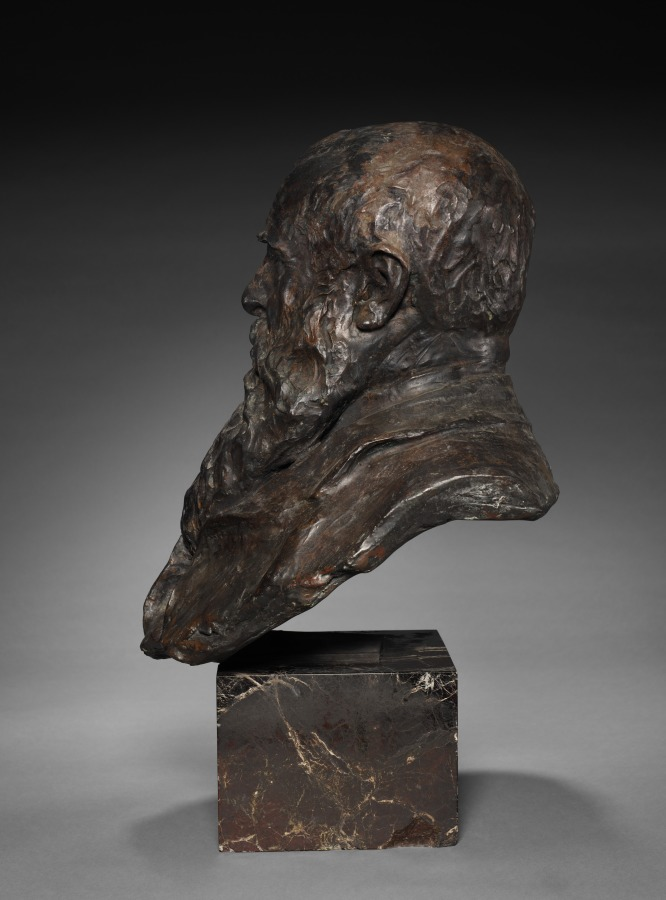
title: Claude Monet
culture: France, 20th century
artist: Paul Paulin (French, 1852–1937)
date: late 1800s-early 1900s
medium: bronze, marble base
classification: Sculpture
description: Paul Paulin was a renowned Parisian dentist who had a passion for sculpting and was encouraged by Edgar Degas to pursue an artistic career. Paulin is best known for his portrait busts of notable Impressionists. There are related versions of this portrait bust of the celebrated painter Claude Monet at three museums in Paris: the Petit Palais (plaster), the Musée d'Orsay (bronze), and the Musée Rodin (bronze).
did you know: In addition to Claude Monet, Paul Paulin also made portrait busts of Edgar Degas, August Renoir, Camille Pissarro, and Auguste Rodin.